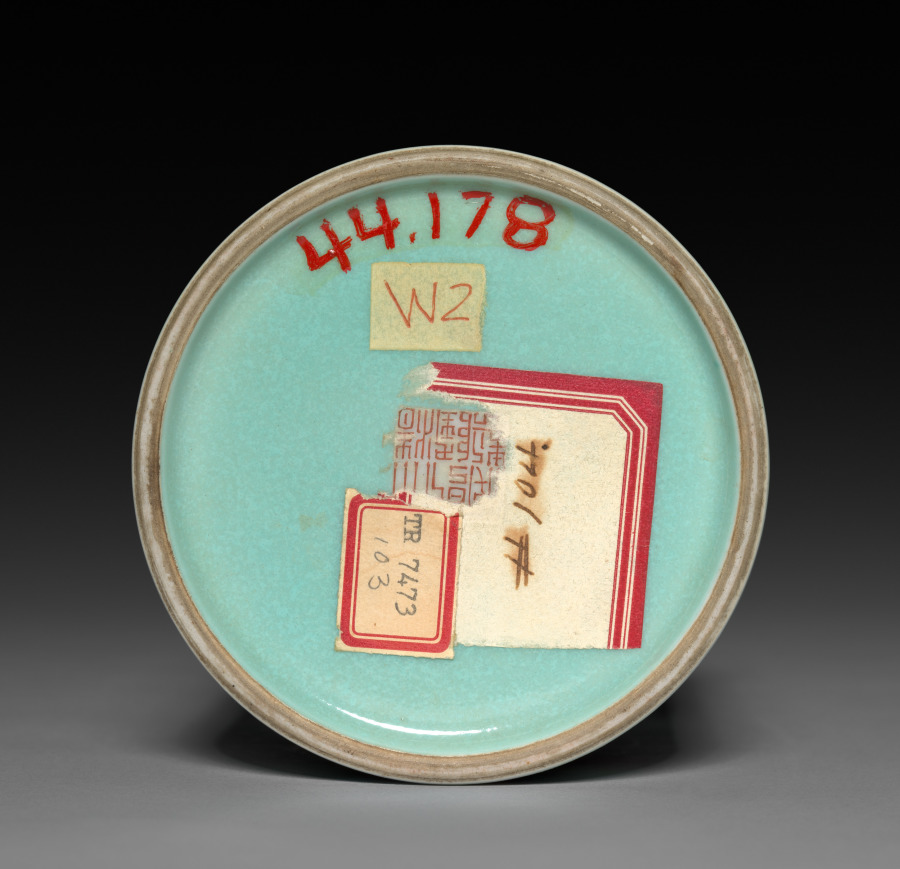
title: Cylindrical Brushholder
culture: China, Qing dynasty (1644–1911), Qianlong reign (1736–95)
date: 1736–95 or later, mid-1800s?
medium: porcelain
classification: Ceramic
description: The brush holder shows children celebrating seasonal festivals, pursuing games, and masquerading as adults with attributes that suggest their future careers in the military or civil service. Three boys play in the shadow of a garden rock with cricket cages; others parade a boy on a goat who wears the headgear of a scholar who passed first in the state examinations. Left to the goat kneels a boy who is about to ignite fire crackers lined up on a stone, a custom to celebrate the New Year. Moreover, the combinations of motifs form puns that express auspicious wishes.